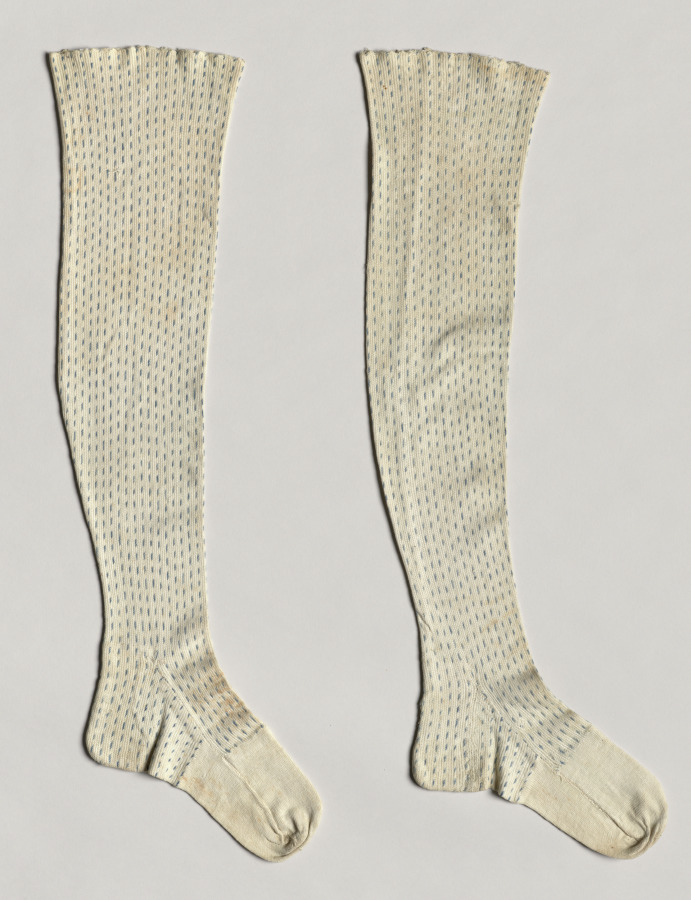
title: Pair of Stockings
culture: America, New York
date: 1790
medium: knitting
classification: Knitting